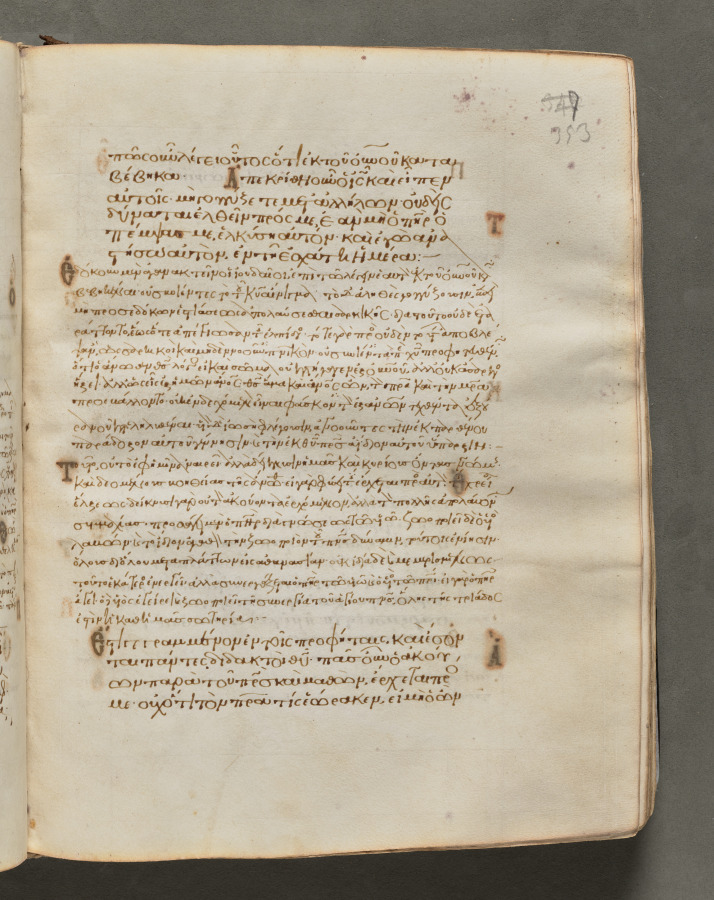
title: Text, folio 353 (recto), from a Gospel Book with Commentaries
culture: Byzantium, Constantinople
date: c. 1000–1100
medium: ink, tempera, and gold on vellum; leather binding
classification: Bound Volume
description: Each of the four gospels in this book opens on a page with brilliantly illuminated borders depicting the author of the text as well as birds—principally peacocks, symbols of the immortality of the soul—and fountains, representing the fountain of life and the salvation of the soul. This volume consists of 428 leaves with texts in Greek. Its level of sophistication suggests that it was probably written and decorated in a monastery in Constantinople.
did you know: Gospel books were carried in procession through Byzantine churches.